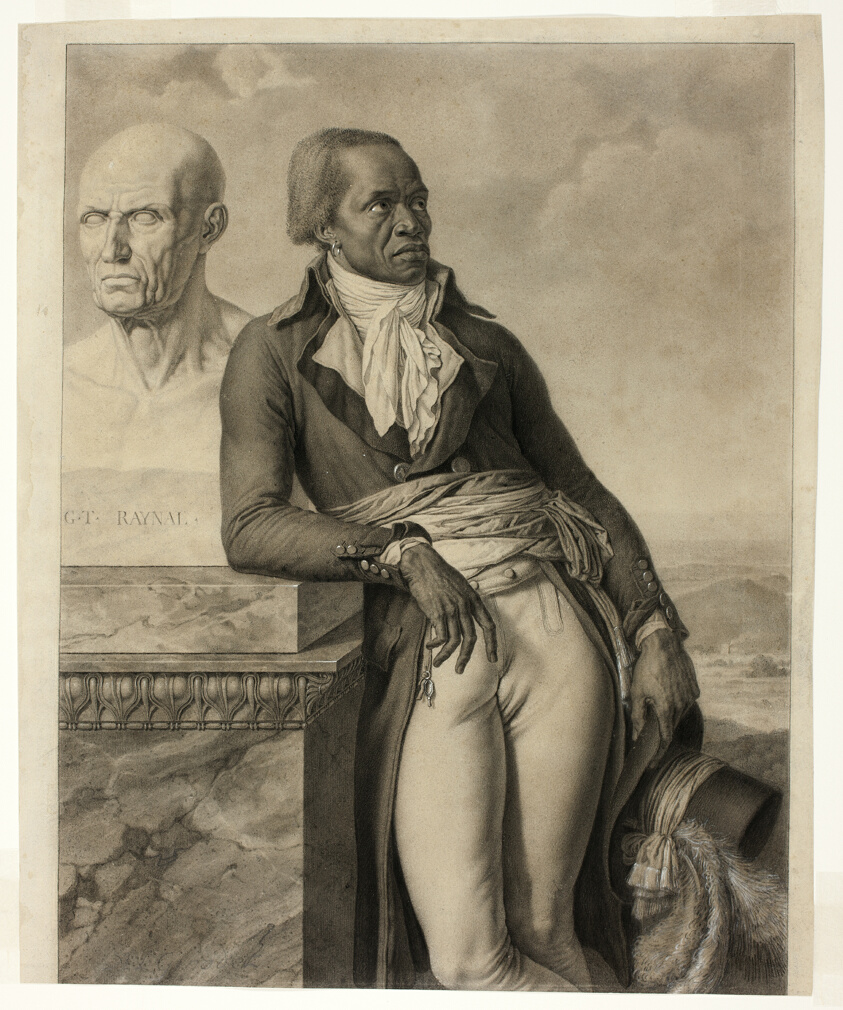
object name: Drawing and Watercolor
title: Jean-Baptiste Belley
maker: Attributed to Anne-Louis Girodet de Roucy-Trioson; French, 1767-1824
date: c. 1797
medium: Black chalk, with stumping, and traces of pen and black ink, heightened with touches of opaque white, on ivory wove paper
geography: France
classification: graphite; drawings (visual works); prints and drawing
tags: study